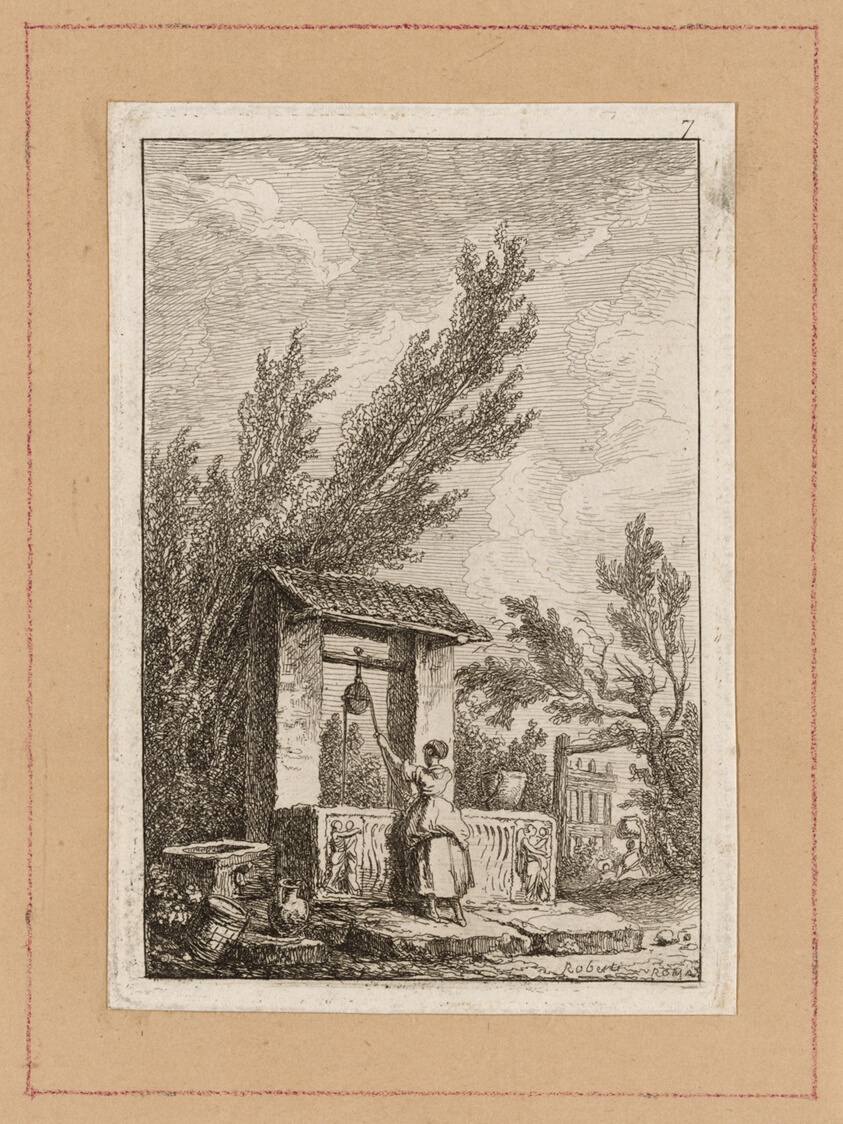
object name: Print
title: Plate Seven from Evenings in Rome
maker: Hubert Robert (French, 1733–1808)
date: 1763/64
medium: Etching in black on off-white laid paper, tipped onto tan laid paper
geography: France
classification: etching; paper; print; prints and drawing